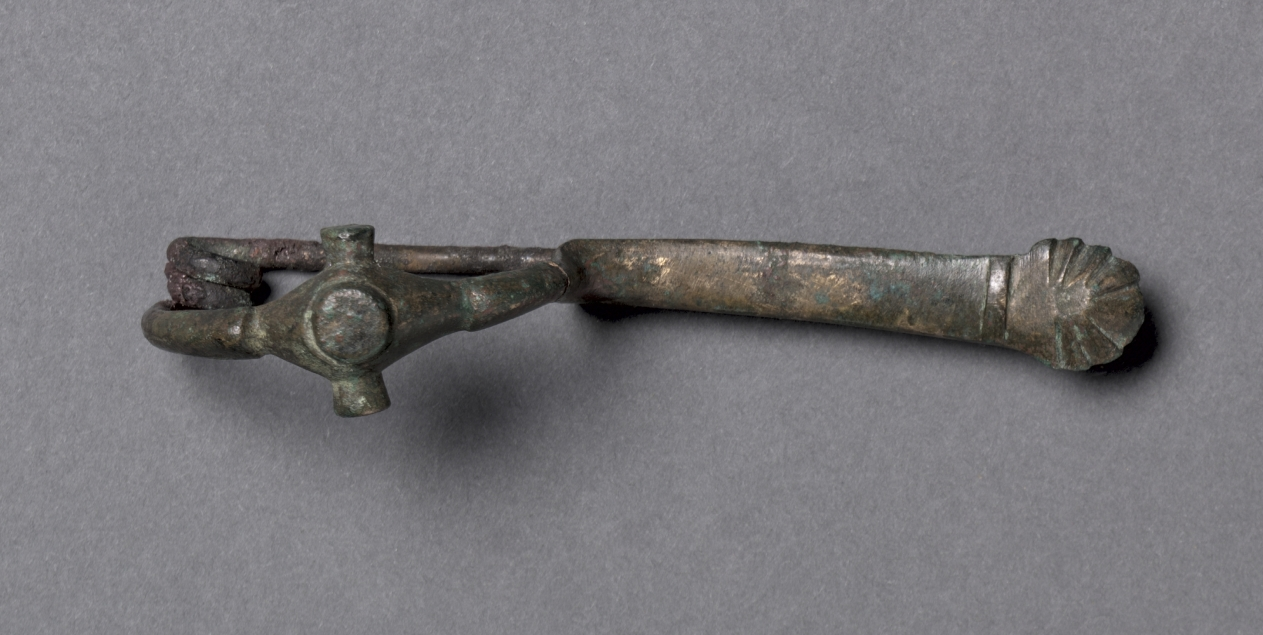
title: Fibula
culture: Etruscan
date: c. 700 BCE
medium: bronze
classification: Jewelry